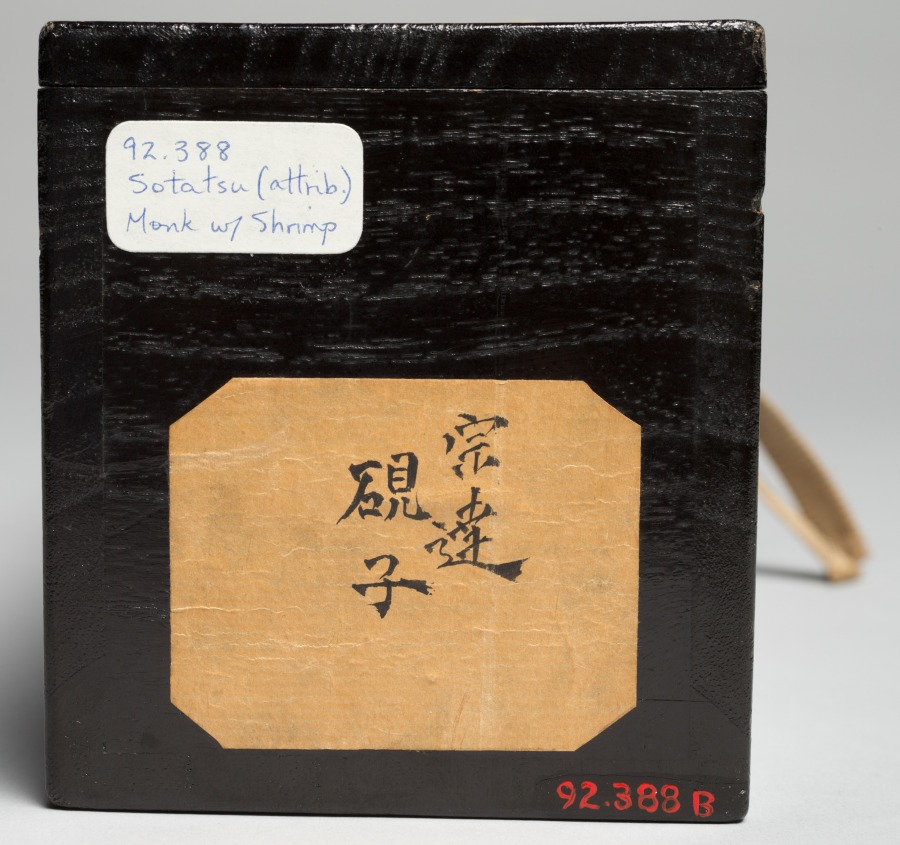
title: Kenshu, Monk with Shrimp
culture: Japan, Edo period (1615–1868)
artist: studio of Tawaraya Sōtatsu (Japanese, c. 1570–c. 1640)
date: c. 1600–1640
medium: hanging scroll; ink on paper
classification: Painting